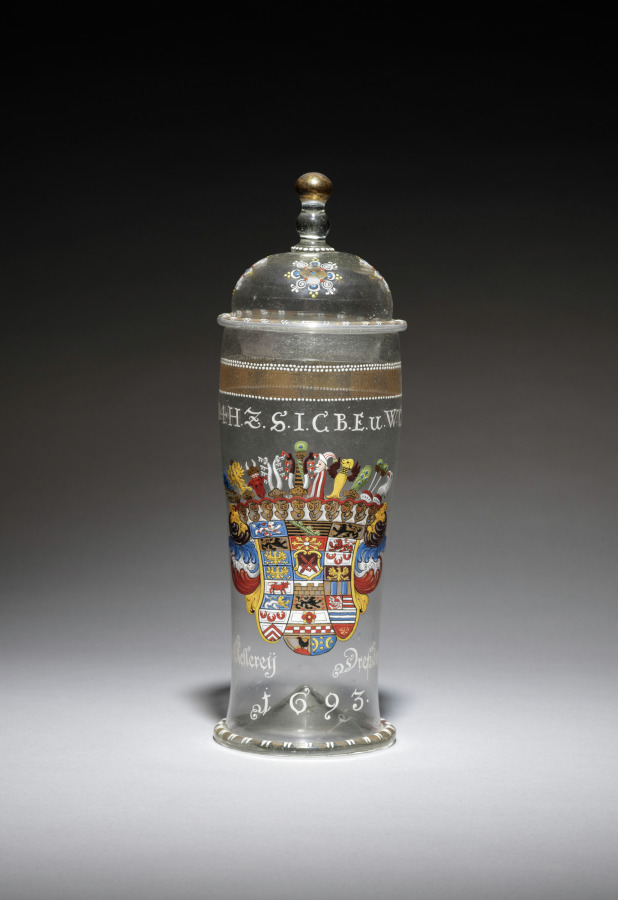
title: Covered Beaker (Humpen)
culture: Germany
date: 1693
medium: enameled glass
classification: Glass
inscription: I[ohann] G[eorg] D[er] 4 H[erzog] z[u] s[achsen] I[ulich] c[leve] B[erg] E[ngern] U[nd] W[estphalia] c[hurfürst]. Below the arms of the duke, in white enamel is the inscription: HOFFKELLEREY, DRESZDEN.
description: This humpen was made for the court cellar (Hofkellerei), Dresden, which belonged to the House of Saxony, showing the arms of Johann IV zu Sachsen.